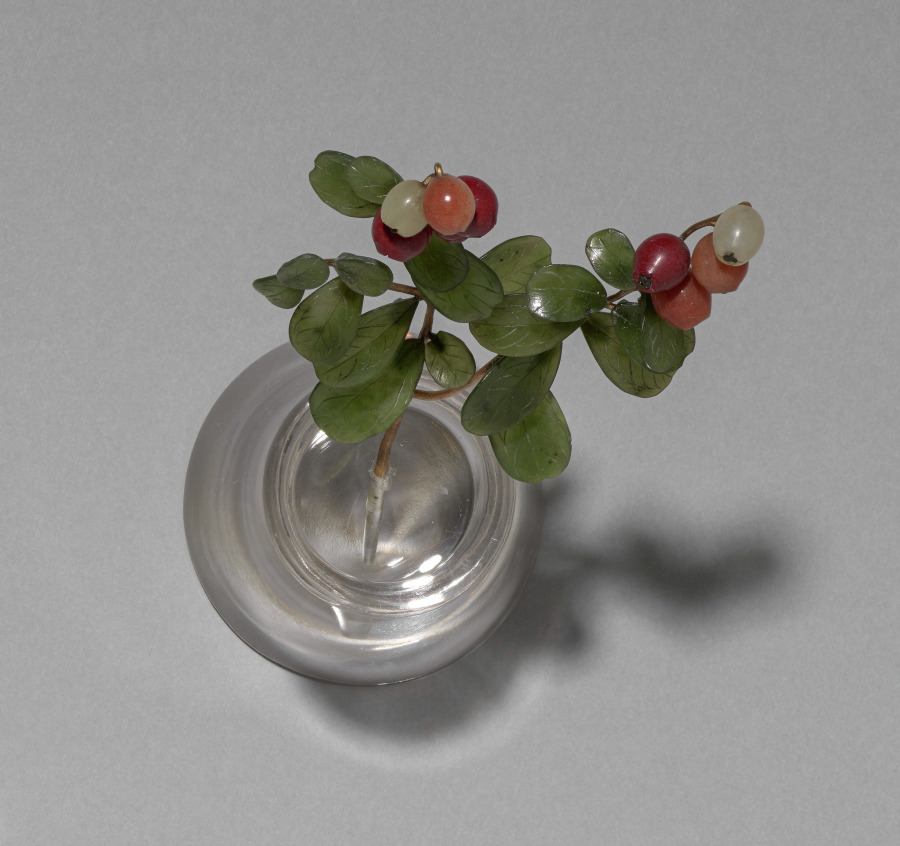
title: Flower Study of a Lowbush Cranberry or Lingonberry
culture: Russia, St. Petersburg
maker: House of Fabergé (Russian, 1842–1918)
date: c. 1885–1915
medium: chalcedony, jade, rock crystal, gold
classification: Miscellaneous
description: This flower study depicts a lowbush cranberry or lingonberry. To achieve a naturalistic effect of ripening fruit, Fabergé varied the coloring of the berries. Some are made of chalcedony in hues of milky white to represent unripe berries, while others appear in deep reddish agate to represent ripe ones. Fabergé’s inspiration for his flower studies is said to have come from the floral brooches of precious stones that were made in the 1700s for Catherine the Great as well as from the Japanese art of flower arranging, known as ikebana. Fabergé’s flower studies were given as intimate gifts to friends by the tsarina and others in the court. She also liked to take them around to wherever the imperial family was residing as a reminder of spring during the harsh Russian winters.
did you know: The stems of Fabergé’s flower studies are set into little basins carved from rock crystal to resemble pots of water.